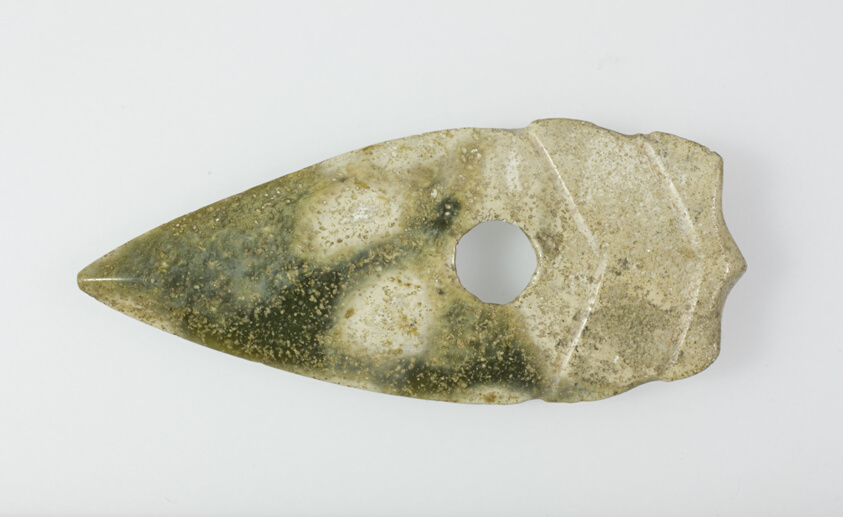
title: Pendant, cicada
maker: China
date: Shang dynasty (c.1600–1050 BC)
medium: Jade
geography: China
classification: jade; asian art